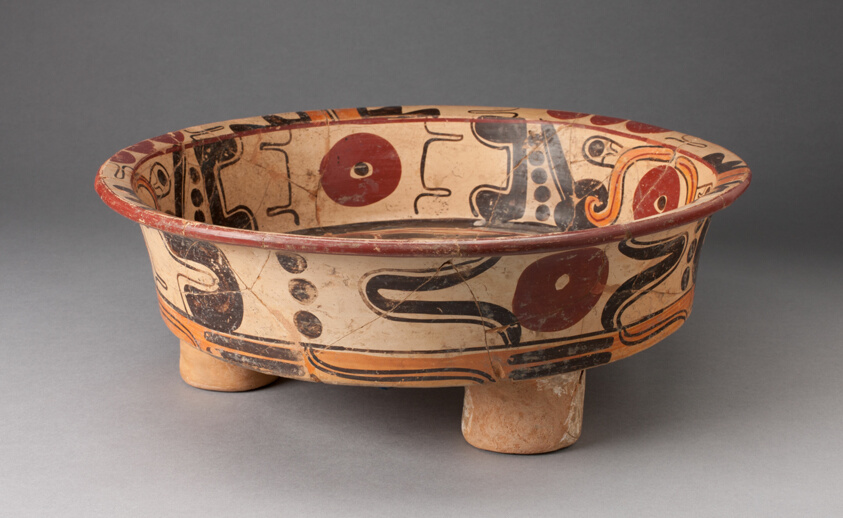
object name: Vessel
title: Tripod Polychrome Bowl Depicting a Serpent with Feathers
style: classic veracruz, mesoamerican, Pre-Columbian, americas, Arts of the Americas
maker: Classic Veracruz; Los Tuxtlas, southern Veracruz, Mexico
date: 500–750 CE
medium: Ceramic and pigment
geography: Southern Veracruz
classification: bowl; earthenware; ceramics; vessel; art of the americas